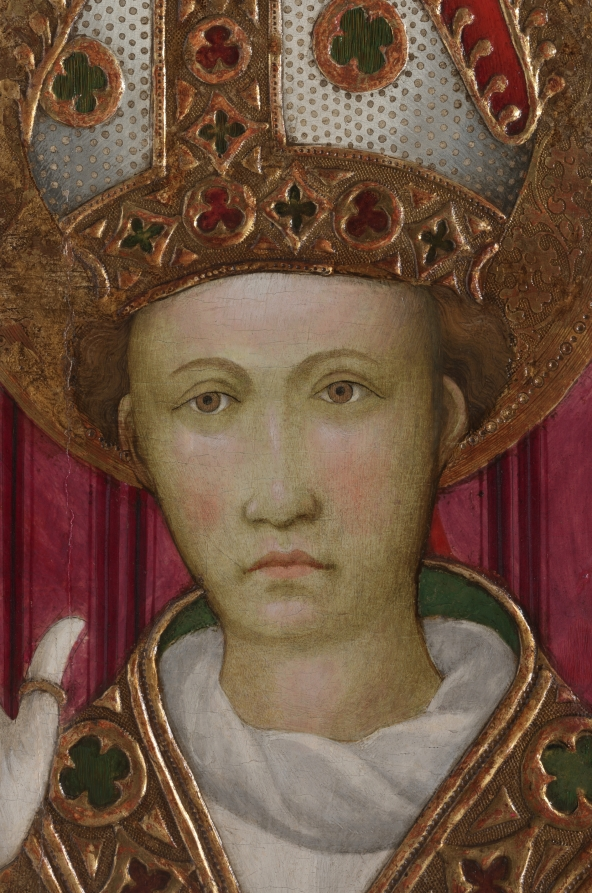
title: A Bishop Saint with a Donor (Saint Louis of Toulouse?)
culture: Spain, Catalonia, early 15th century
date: early 1400s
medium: tempera with raised and gilded gesso on wood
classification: Painting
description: The style of this painting suggests that it comes from Catalonia in northeastern Spain, though the identity of its artist remains unknown. The painting represents a youthful bishop-saint identifiable by a bishop’s symbols of authority, his miter and crozier. He wears rich vestments. Below, the figure in black represents the donor of the painting—likely a wealthy layperson rather than a cleric. The identity of the saintly bishop is speculated to be Saint Louis, Bishop of Toulouse, on the basis of his youth. Louis was consecrated Bishop of Toulouse in 1297, died six months later at the age of 23, and was canonized in 1317. His relics were moved in 1423 to Valencia and his cult flourished in Spain.